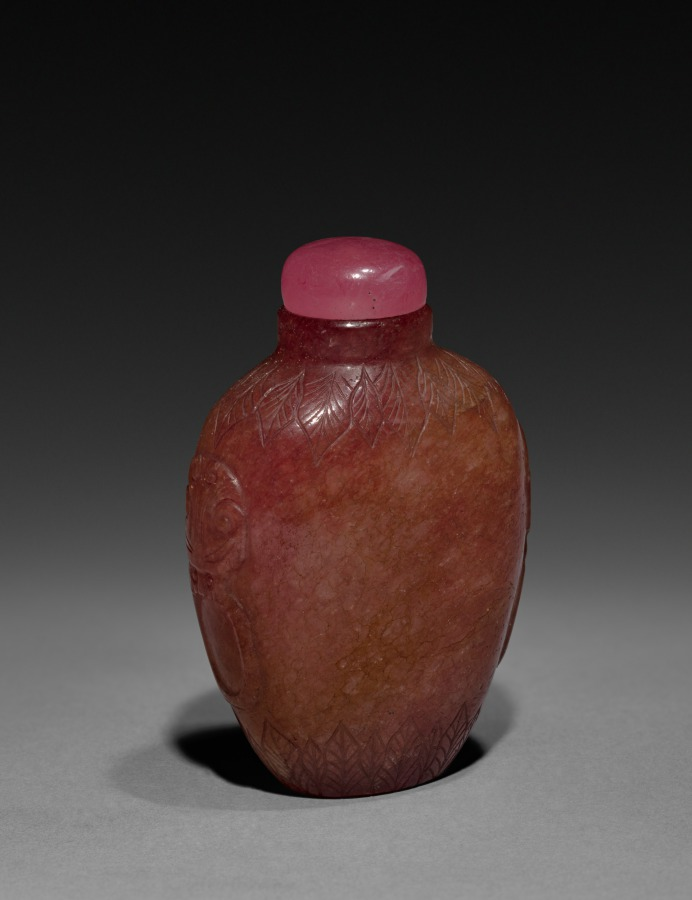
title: Snuff Bottle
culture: China, Qing dynasty (1644-1911)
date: 1644–1911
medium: glass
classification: Glass